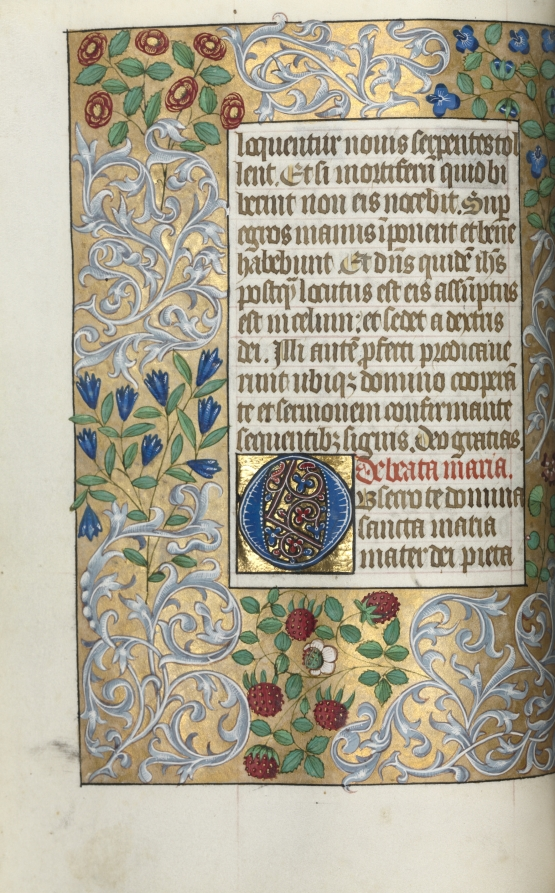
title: Book of Hours (Use of Rouen): fol. 18v, Prayers to the Virgin, Large Initial O with Elaborate Border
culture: France, Rouen, 15th century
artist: Master of the Geneva Latini (French, active Rouen, 1460–80)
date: c. 1470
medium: ink, tempera, and gold on vellum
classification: Bound Volume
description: In the late 1400s and early 1500s Rouen was an established and important center of book production. The city’s cathedral had a wealthy chapter that spent large sums of money to commission books and to maintain its extensive library. The stationers and booksellers would have likely been concentrated in or near the cathedral precinct. This artist, named after a manuscript now in Geneva, was Rouen’s principal illuminator during the second half of the 1400s.